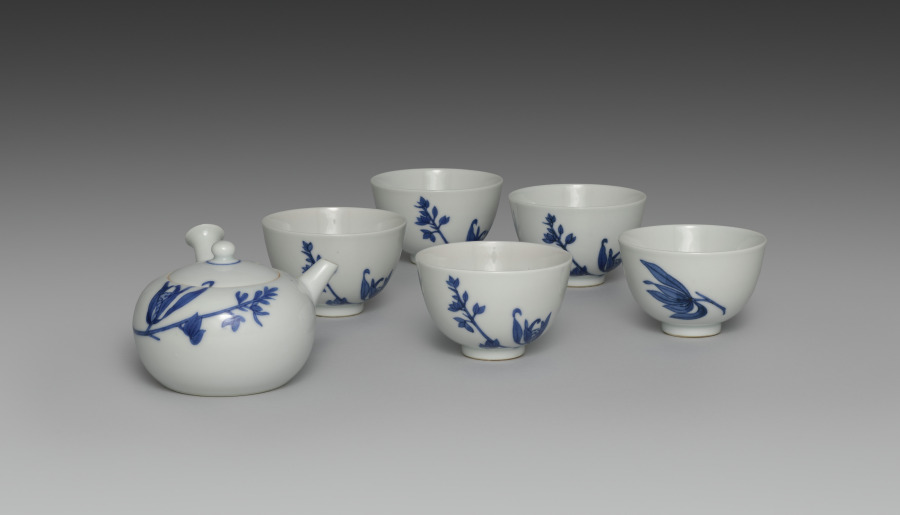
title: Tea Set with Orchids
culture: Japan, Meiji period (1868–1912)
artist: Seifū Yohei III (Japanese, 1851–1914)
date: c. 1893–1914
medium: Teapot with set of five teacups; porcelain with underglaze blue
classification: Ceramic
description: Although the teapot here is stored in a separate box from the five cups, these six pieces may once have been part of a tea set that included other tools such as a water cooler. The teacups have orchid flowers on both sides in underglaze blue, as well as a blue band inside the footring. The teapot has the same design and a blue band painted around the bottom of the lid’s knob. The cups’ long wood storage box is stamped on the exterior, over the lid and base, with a small red seal reading “Satō.” The same seal appears on five small squares of yellow textile, one placed in the bottom of each compartment in the teacup storage box. These are additional to the customary yellow cloths stamped with a “Seifu” seal. Interestingly, four of the Seifū cloths are stamped with an ovoid seal, while the remaining cloth, which is a slightly lighter color, has an unusual seal that is not quite gourd-shaped and with the fū of Seifū in a stylized, unrecognizable form. The teapot has its own box with a Satō seal and is wrapped with an orange textile stamped with the same unusual Seifū seal. A set with a very similar surface design is in the Brooklyn Museum. The Brooklyn set has a water cooler and a small pitcher, in addition to the teapot and cups, and all are in a single storage box. This box records the tea tools as made with kanpakuji, or “bright-jewel white porcelain,” counted among Yohei III’s most important inventions, and carved images. In fact, both sets have a white surface much closer in coloration to the cool white of porcelain clay used in Kyoto at the time, and the designs are simply painted. The Brooklyn set was thus likely mismatched at some point with a box intended for another tea set. Nonetheless, the box may have helped prevent the set’s original components from being dispersed, and the set itself provides insight into how the other tools from the present set may have looked.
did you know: This tea set with orchids has a side-handled pot called a kyūsu, used for steeping, straining, and serving tea.